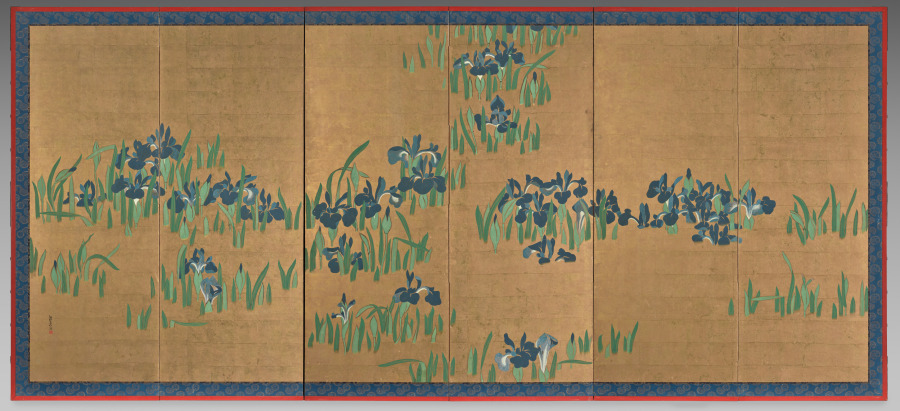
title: Irises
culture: Japan, Edo period (1615–1868)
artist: Watanabe Shikō (Japanese, 1683–1755)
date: 1700s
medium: One of a pair of six-panel folding screens, ink and color on gilded paper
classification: Painting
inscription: signed and sealed lower right of the first panel from the right.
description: The subject of this painting comes from a 10th-century text. It tells of a young nobleman’s journey into the lonely countryside, far from the capital city of Heian-kyō (Kyoto). There he came upon a small stream, the banks of which were covered with blooming irises, on which the artist has chosen to focus our attention. While viewing the beautiful flowers the nobleman composed a poem: I have a beloved wife, Familiar as the skirt of a well-worn robe, And so this distant journeying Fills my heart with grief.